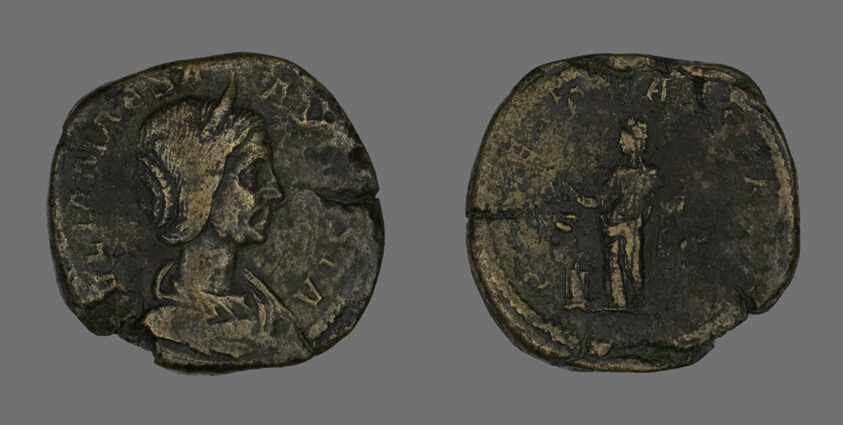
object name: Coin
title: Sestertius (Coin) Portraying Julia Maesa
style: roman (ancient, style or period)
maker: Roman, minted in Rome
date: 223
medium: Bronze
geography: Roman Empire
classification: coin; ancient art